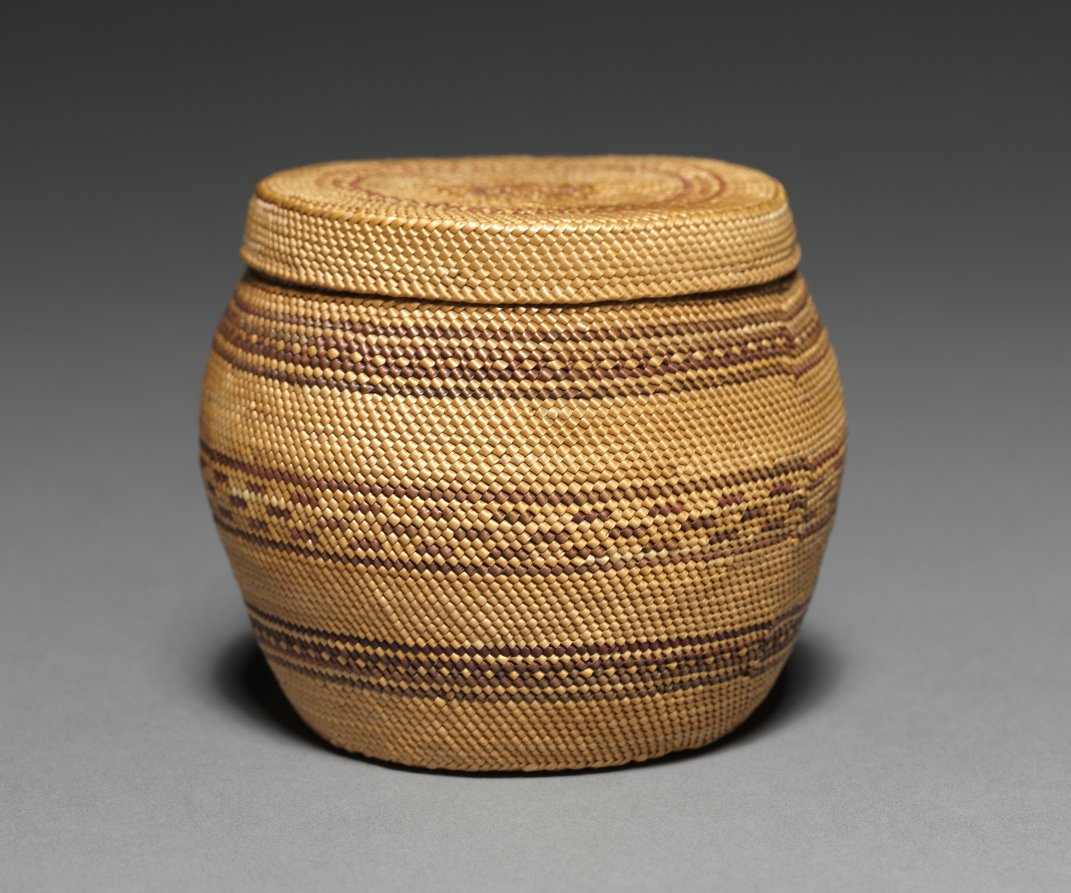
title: Covered Bowl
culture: Northwest Coast, Vancouver Island, late 19th century (?)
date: c. 1875–1900?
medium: twined grass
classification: Basketry